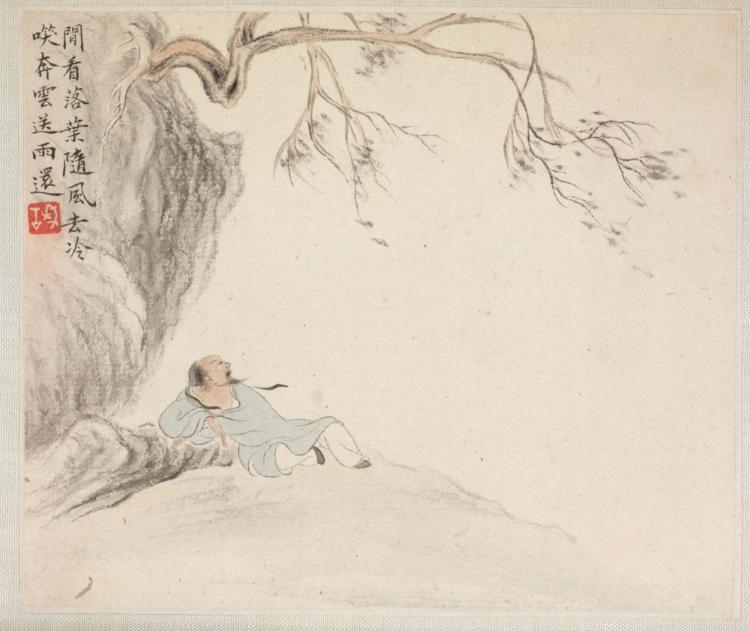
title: Album of Landscape Paintings Illustrating Old Poems: A Man Reclining and Enjoying the View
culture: China, Qing dynasty (1644-1911)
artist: Hua Yan (Chinese, 1682–c. 1765)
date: 1745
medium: album leaf, ink and light color on paper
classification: Painting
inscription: Calligraphy and seal, upper left corner